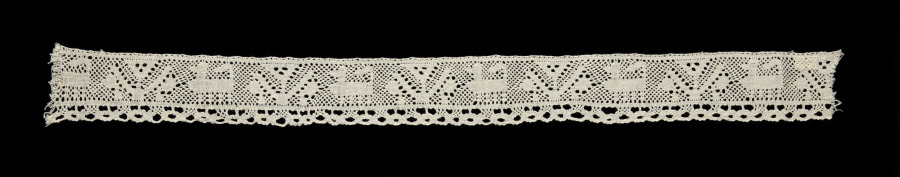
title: Lace Edging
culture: Italy, Abruzzi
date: 1700s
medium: Cotton: bobbin lace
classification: Lace